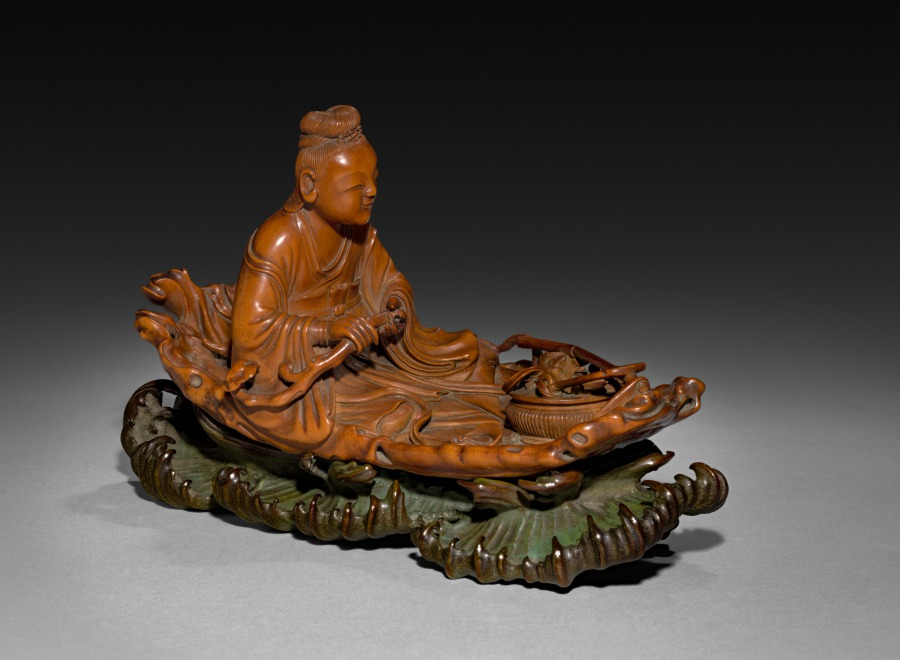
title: Figure of Daoist Immortal He Xiangu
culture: China, Qing dynasty (1644-1911)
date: 1700s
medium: Boxwood with colored ivory base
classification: Wood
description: He Xiangu is one of the Eight Immortals in the Daoist pantheon. She was thought to have been a real person who lived in the Tang dynasty, originally named He Qiong. As a teenager, she was instructed in a dream to eat powdered mica to become immune from death and to vow to remain unmarried. She did so and became an enlightened practitioner of Daoism. In this delicate carving, He Xiangu is placidly seated in a gnarled and knotty wooden raft amid green-tinted ivory waves. In front of her rests a bamboo basket filled with objects associated with Daoist immortality, while she holds a branch of lingzhi fungus.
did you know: Her basket contains plants and herbs used by Daoists for attempting to achieve immortality.